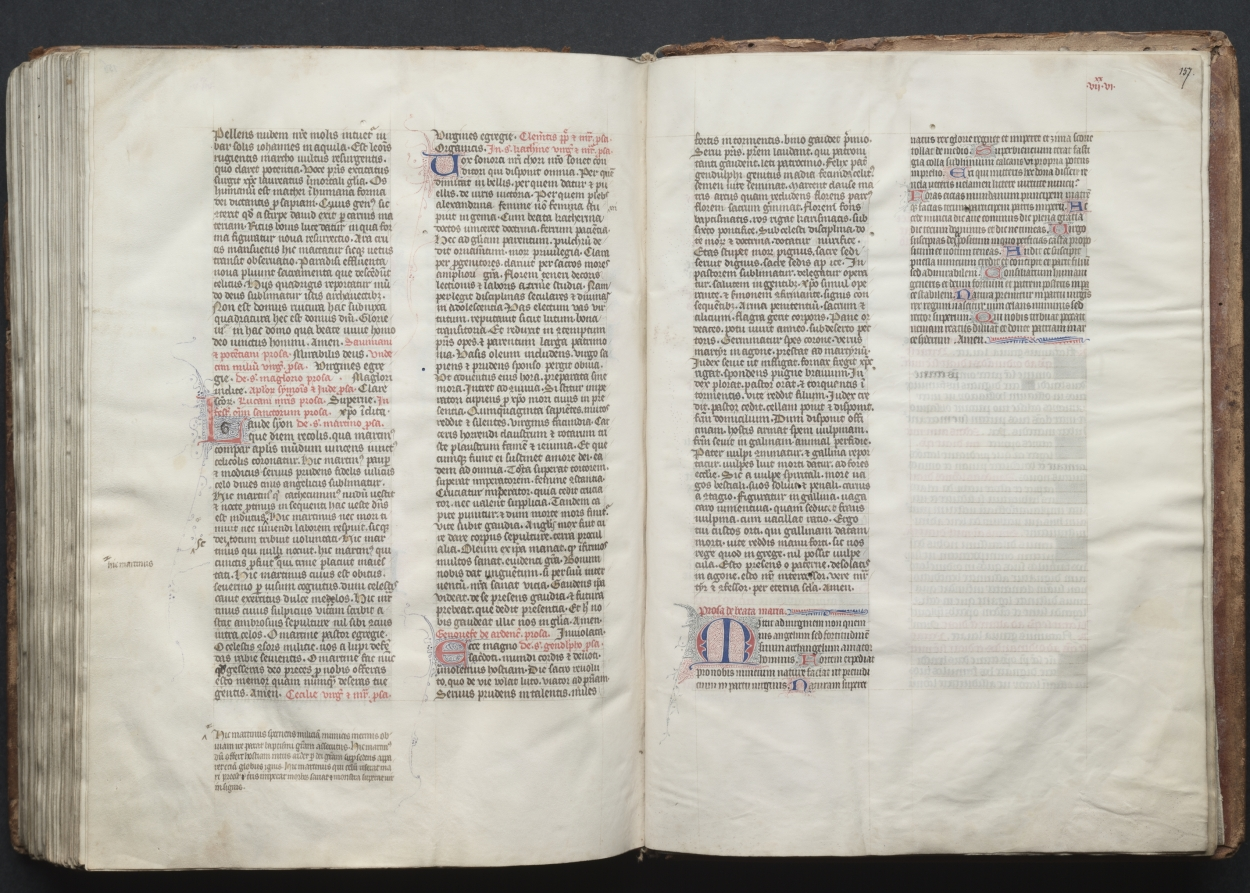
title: The Gotha Missal: Fol. 157r, Text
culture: France, Paris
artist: Master of the Boqueteaux (French)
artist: and Workshop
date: c. 1375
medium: ink, tempera, and gold on vellum; blind-tooled leather binding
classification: Bound Volume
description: The style and quality of this manuscript's decoration is typical of deluxe Parisian books made for aristocratic or royal patrons. Most of the book's decoration appears to be the work of the Master of the Boqueteaux, an artist active at the court of King Charles V (died 1380). His style was apparently shared by a number of book illuminators working in and around Paris. It is very possible that the Gotha Missal belonged to Charles V, but is not provable because the manuscript has no royal portraits and lacks a colophon. Given the book's magnificent decoration, however, it would seem that it was produced for a Valois prince, if not for the king himself. The manuscript receives its name from the German dukes of Gotha, its later owners.